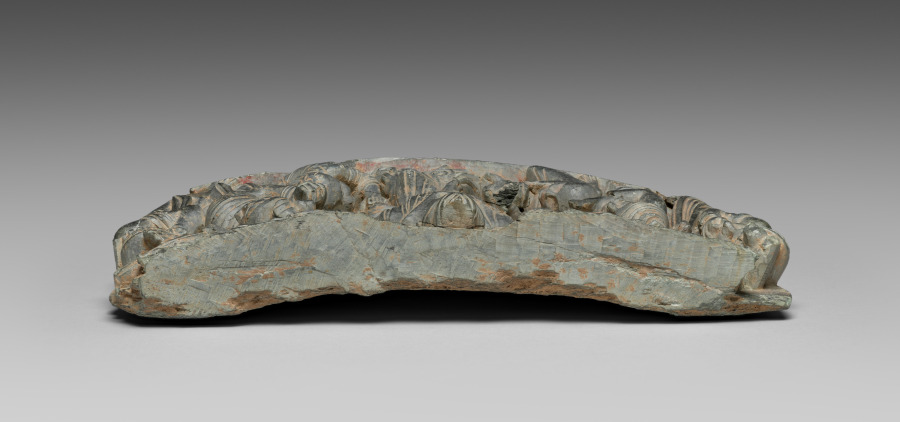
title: The Great Miracle at Shravasti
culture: Pakistan, Gandhara, Peshawar Valley, early Kushan period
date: c. 100 CE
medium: schist with traces of gold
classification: Sculpture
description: After the Buddha reached enlightenment, he spent the remainder of his life traveling around northeastern India, giving teachings and performing miracles in order to convert followers and establish the Buddhist community. One of his most famous miracles is when he levitated and caused fire to leap from his shoulders and water to flow from his feet. The figures of two monks kneel in worship. Others press their hands together in a sign of devotion and submission, while the figures on the outer edges whistle and shake their upper garments, as was customary when an amazing sight was seen.